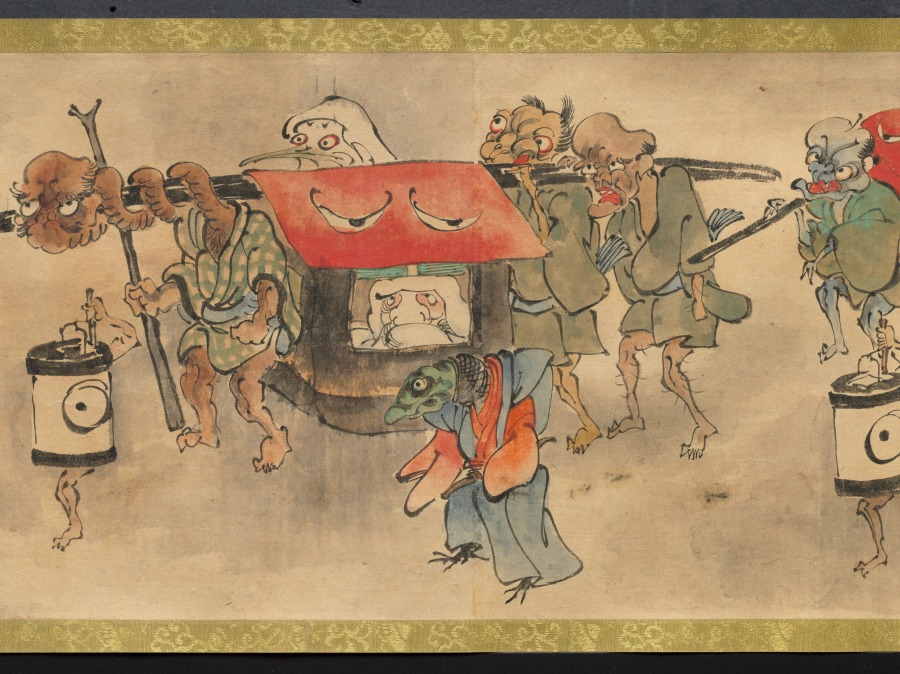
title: An Illustrated Marriage of Apparitions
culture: Japan, Edo period (1615–1868)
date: mid-1800s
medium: handscroll; ink and color on paper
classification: Painting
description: The matchmaking, engagement, wedding, and birth of the first child of two apparitions, or bakemono, literally "things that change," are illustrated in this whimsical, humorous handscroll. Japanese folklore abounds with such strange creatures, most famously represented in handscrolls featuring a procession of 100 supernatural monsters. Aside from a textual preface and cartouches indicating the content of the scenes, the tale is told visually. The artist and whereabouts of the original handscroll are unknown, but a number of other 19th-century copies by amateur painters exist in Japanese collections, attesting to its broad appeal.